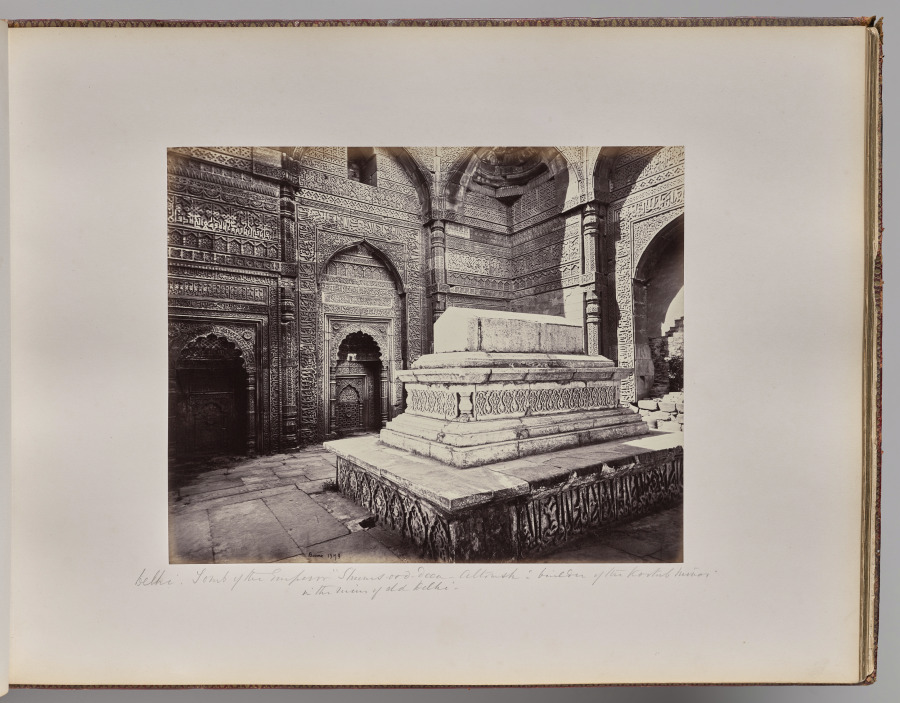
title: Delhi. Tomb of the Emperor Shums ooo deen Allomsh, Builder of the Kootub Minar in the Ruins of Old Delhi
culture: England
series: Photographs of Northern India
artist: Samuel Bourne (British, 1834–1912)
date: 1863–70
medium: albumen print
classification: Photograph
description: The 50 images in this album, all taken in the 1860s, move from the hill towns of the Himalayas down to cities including Lahore (now in Pakistan), Delhi, Lucknow, Agra, Benares (now Varansi), and Calcutta (now Kolkata). Architectural studies of major monuments offer valuable historical records of what sites such as the Taj Mahal and the imperial mosque of the Mughal emperors in Delhi looked like before 20th-century restorations.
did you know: Samuel Bourne, the author of most the images in this album, was a banker in England before he moved to India to become a professional photographer.